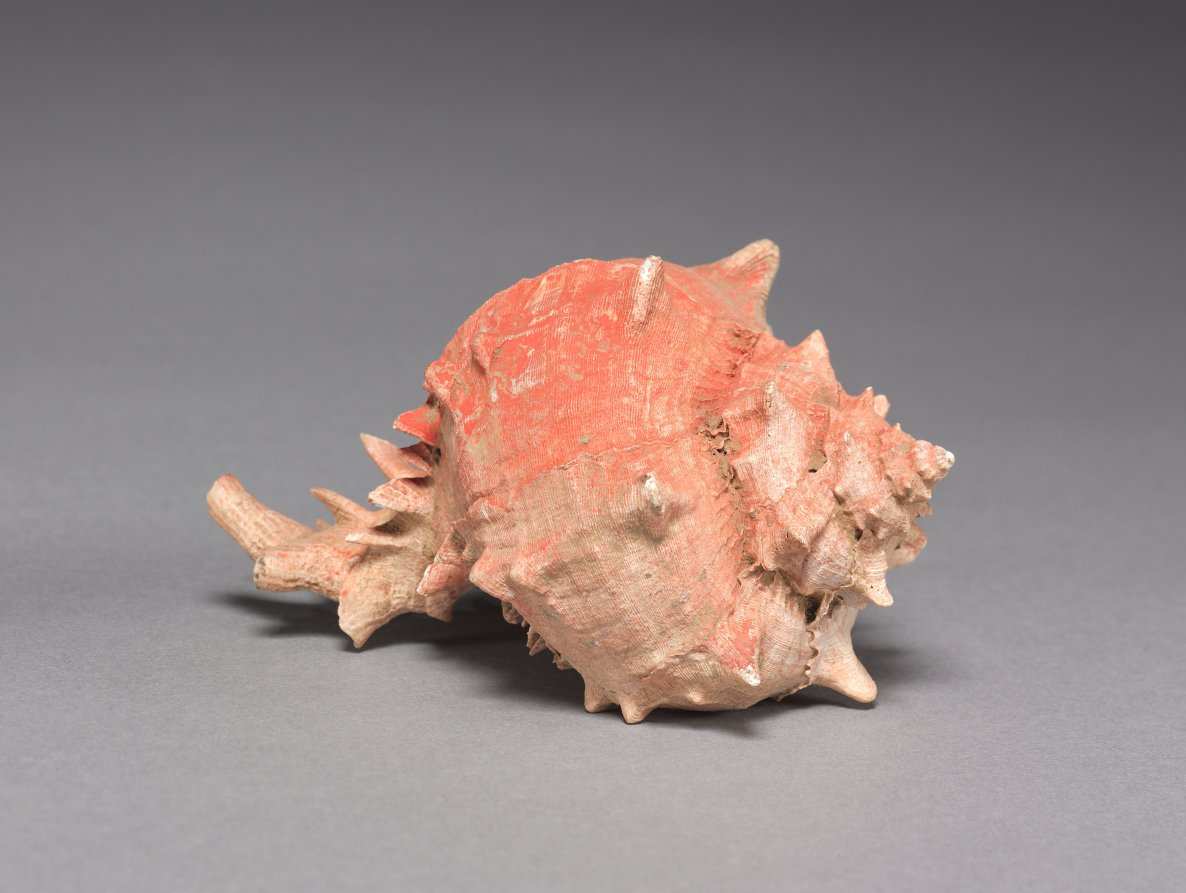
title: Offering Group: Large Shell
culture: Mexico, Guerrero(?), San Jerónimo de Juárez, Xochicalco style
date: c. 800–1200(?)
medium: shell, red pigment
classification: Sculpture